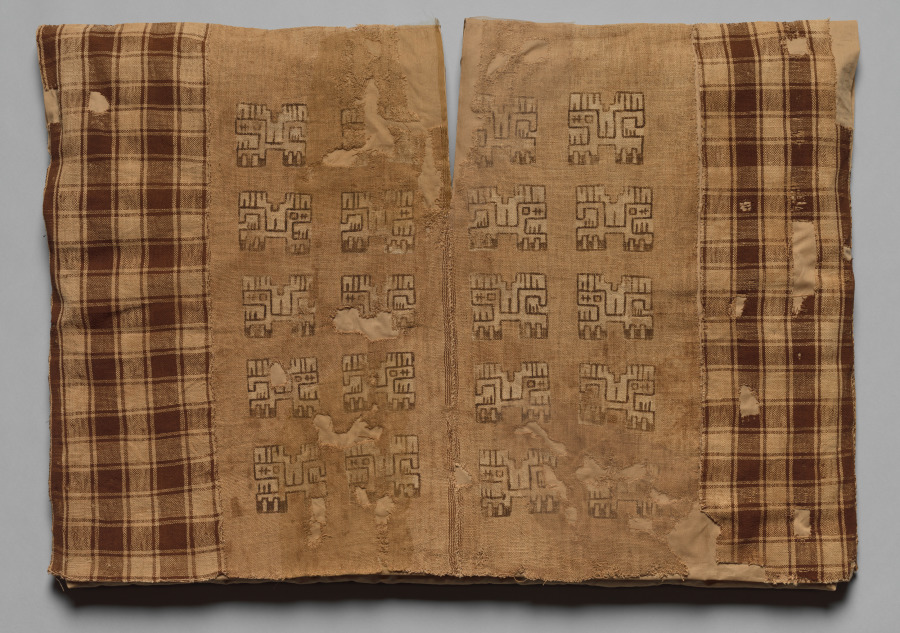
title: Tunic with Profile Animals and Checkerboards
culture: Peru, South Coast, Paracas or Nasca?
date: 410–540 CE (radiocarbon date, 93% probability)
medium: cotton; dye-patterned plain weave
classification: Textile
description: The imagery in the central field of this unique tunic—animals with long tails and three-toed feet—seems to have been created by painting a slurry-like material on the pale areas to protect them when the fabric was immersed in a bath that turned other areas light brown. Then the slurry was removed, revealing the pattern. The checkerboard areas at the sides, on the other hand, are woven with brown and cream-colored yarns. Specialists puzzle over the origins of the tunic, some attributing it to the Paracas (700 BCE–1 CE) and others to the Nasca (100 BCE–650 CE), who sprang from Paracas roots.